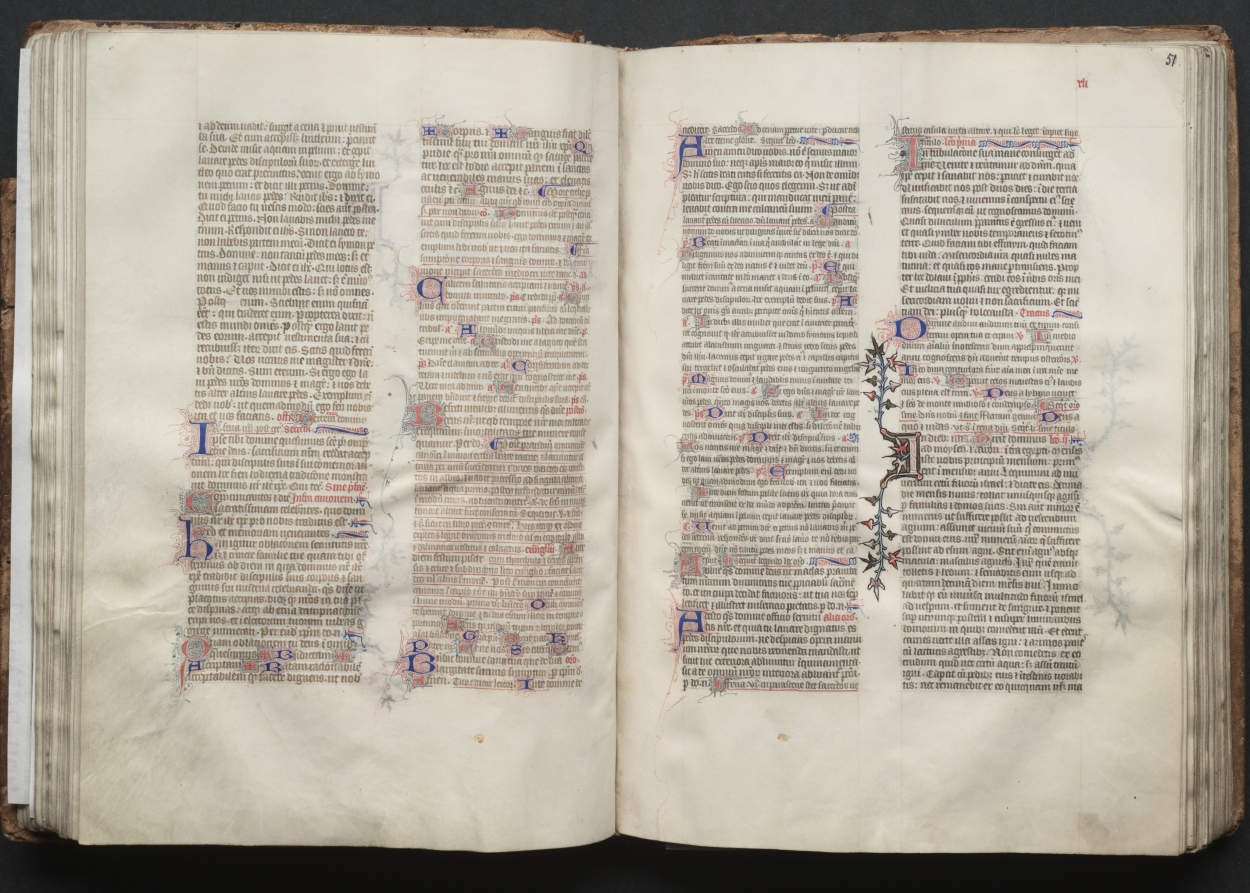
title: The Gotha Missal: Fol. 51r, Text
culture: France, Paris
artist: Master of the Boqueteaux (French)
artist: and Workshop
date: c. 1375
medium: ink, tempera, and gold on vellum; blind-tooled leather binding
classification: Bound Volume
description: The style and quality of this manuscript's decoration is typical of deluxe Parisian books made for aristocratic or royal patrons. Most of the book's decoration appears to be the work of the Master of the Boqueteaux, an artist active at the court of King Charles V (died 1380). His style was apparently shared by a number of book illuminators working in and around Paris. It is very possible that the Gotha Missal belonged to Charles V, but is not provable because the manuscript has no royal portraits and lacks a colophon. Given the book's magnificent decoration, however, it would seem that it was produced for a Valois prince, if not for the king himself. The manuscript receives its name from the German dukes of Gotha, its later owners.